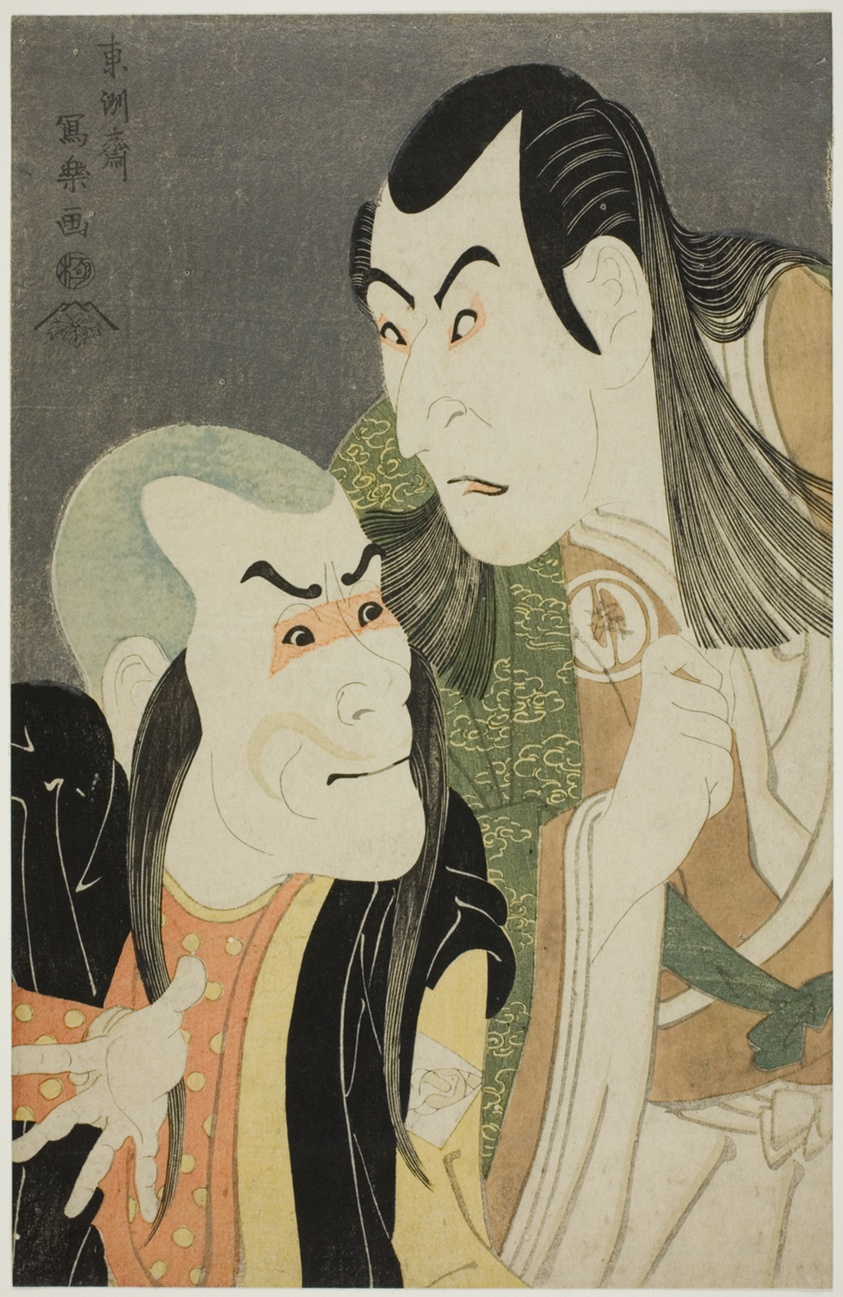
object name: Print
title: The actors Sawamura Yodogoro II (R) as Kawatsura Hogen and Bando Zenji (L) as Onisadobo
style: Japanese (culture or style)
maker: Toshusai Sharaku 東洲斎 写楽; Japanese, active 1794-95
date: 1794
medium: Color woodblock print; oban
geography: Japan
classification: woodblock print; print; asian art